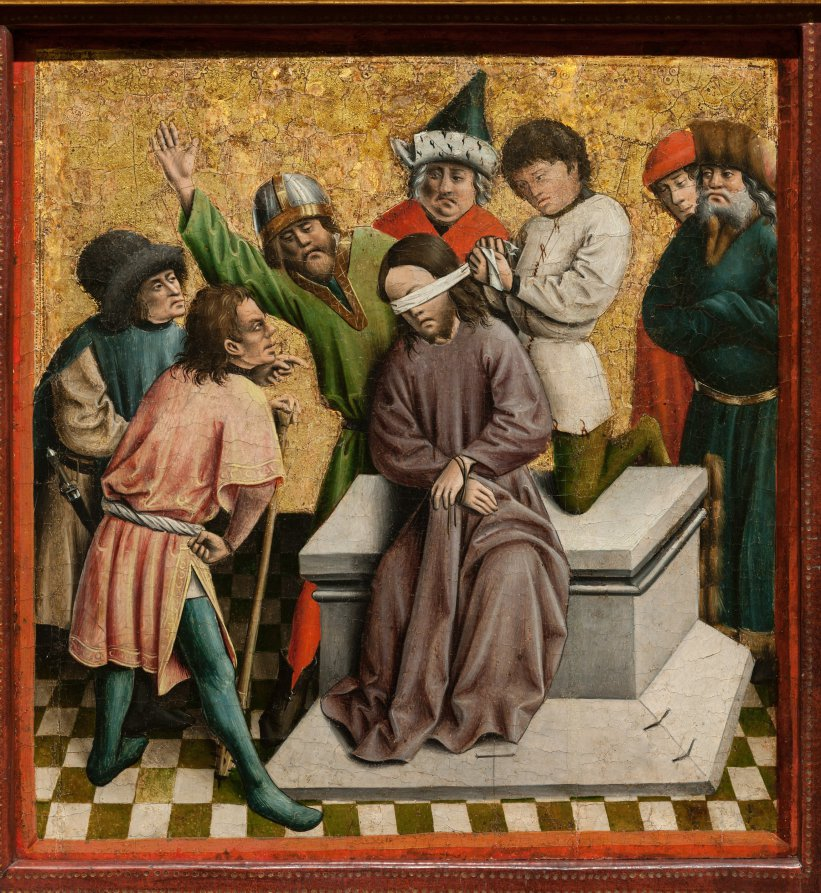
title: Altarpiece with The Passion of Christ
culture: Germany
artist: Master of the Schlägl Altarpiece (German)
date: c. 1440s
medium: oil and gold on wood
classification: Painting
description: The visual focus of this altarpiece is the suffering and death of Christ on the cross. So-called Passion cycles in art include the events leading up to and following the Crucifixion, not only as single subjects but as scenes meant to be read in sequence. Passion cycles were promoted by the two great teaching orders, the Franciscans and the Dominicans, for whom this subject represented the main religious drama of their churches, and also by the German mystics who advocated private contemplation on the humanity and suffering of Christ. The original context for this altarpiece remains unknown, but it was probably made for a religious institution in Westphalia in the Rhine Valley. During the 1870s it was given to the Abbey of Schlägl, near Linz in Upper Austria, from which both altarpiece and artist take their names. The altarpiece is not preserved today in its original format, and some of the individual scenes are missing. Scholars continue to debate the original number of scenes and their sequencing; nine of the original panels have survived.